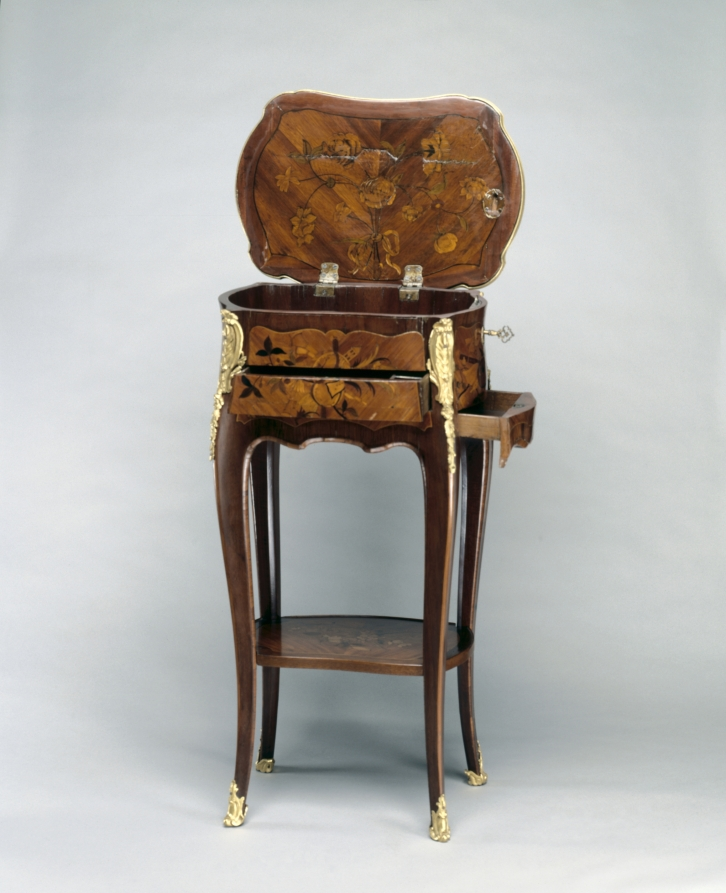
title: Work Table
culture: France, Paris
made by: Bernard Peridiez (French, d. 1757)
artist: or Gerard Peridiez (French, born c.1730)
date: 1700–1799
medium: wood marquetry with gilt bronze mounts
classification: Furniture and woodwork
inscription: signed under shelf: B. Peridiez JNE.